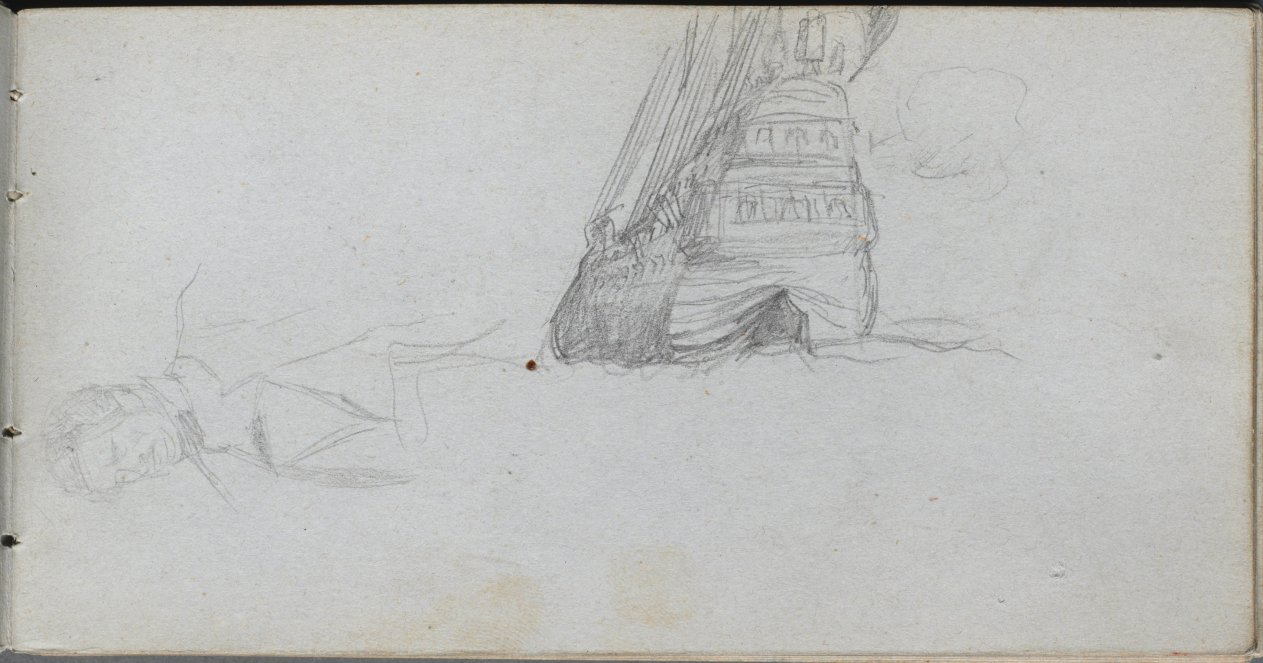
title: Sketchbook, page 84: Figure Study, Study of a Ship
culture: France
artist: Ernest Meissonier (French, 1815–1891)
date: c. 1860s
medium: graphite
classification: Bound Volume